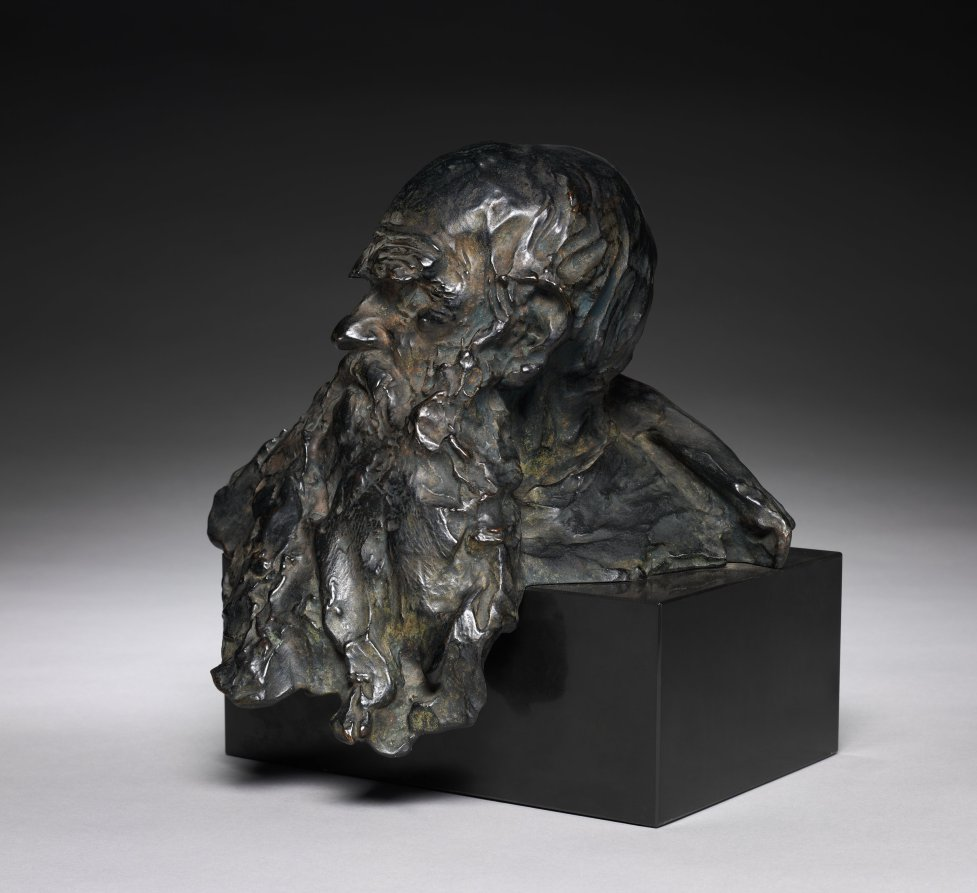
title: Bust of Tolstoy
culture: France, late 19th-early 20th century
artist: Théodore Rivière (French, 1857–1912)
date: d. 1985 – 1905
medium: bronze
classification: Sculpture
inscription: Signed on back of shoulder to left: "Theodore Riviere"